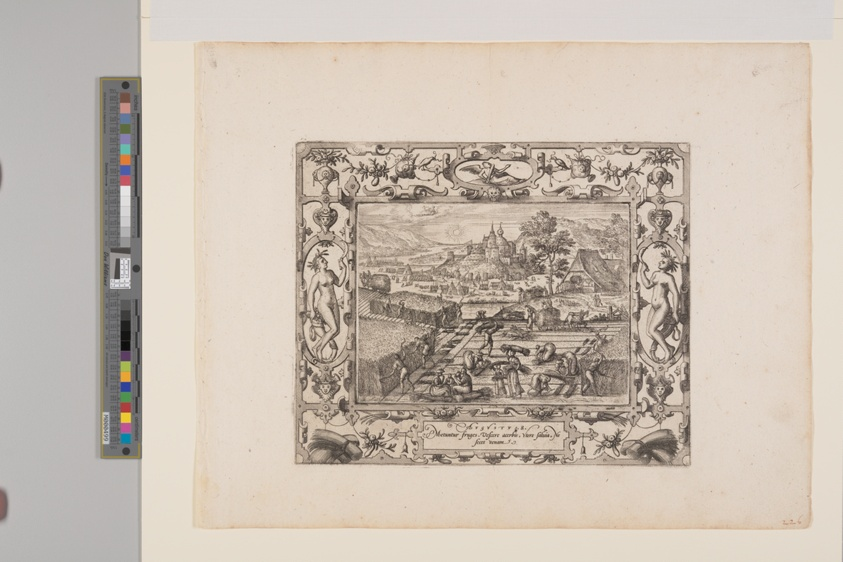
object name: Print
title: August, from The Twelve Months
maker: Pieter van der Borcht (Flemish, 1545–1608) [image]; Johannes van Doetecum (Netherlandish, 1528/32–1605) and Lucas van Doetecum (Dutch, died before 1584) [border]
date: c. 1574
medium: Etching from two plates on ivory laid paper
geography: Flanders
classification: etching; paper; print; prints and drawing